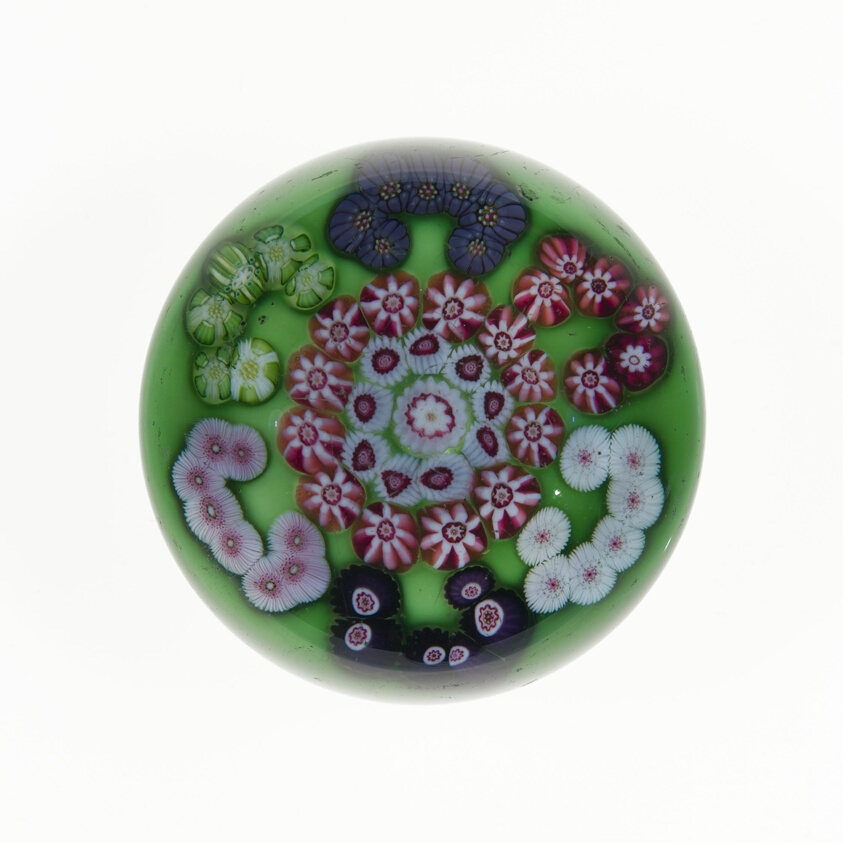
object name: Glass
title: Paperweight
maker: Clichy Glassworks (Cristalleries de Clichy); Clichy, France, 1837-1885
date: 19th century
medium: Glass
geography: Clichy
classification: paperweight; millefiori; european decorative arts; glass